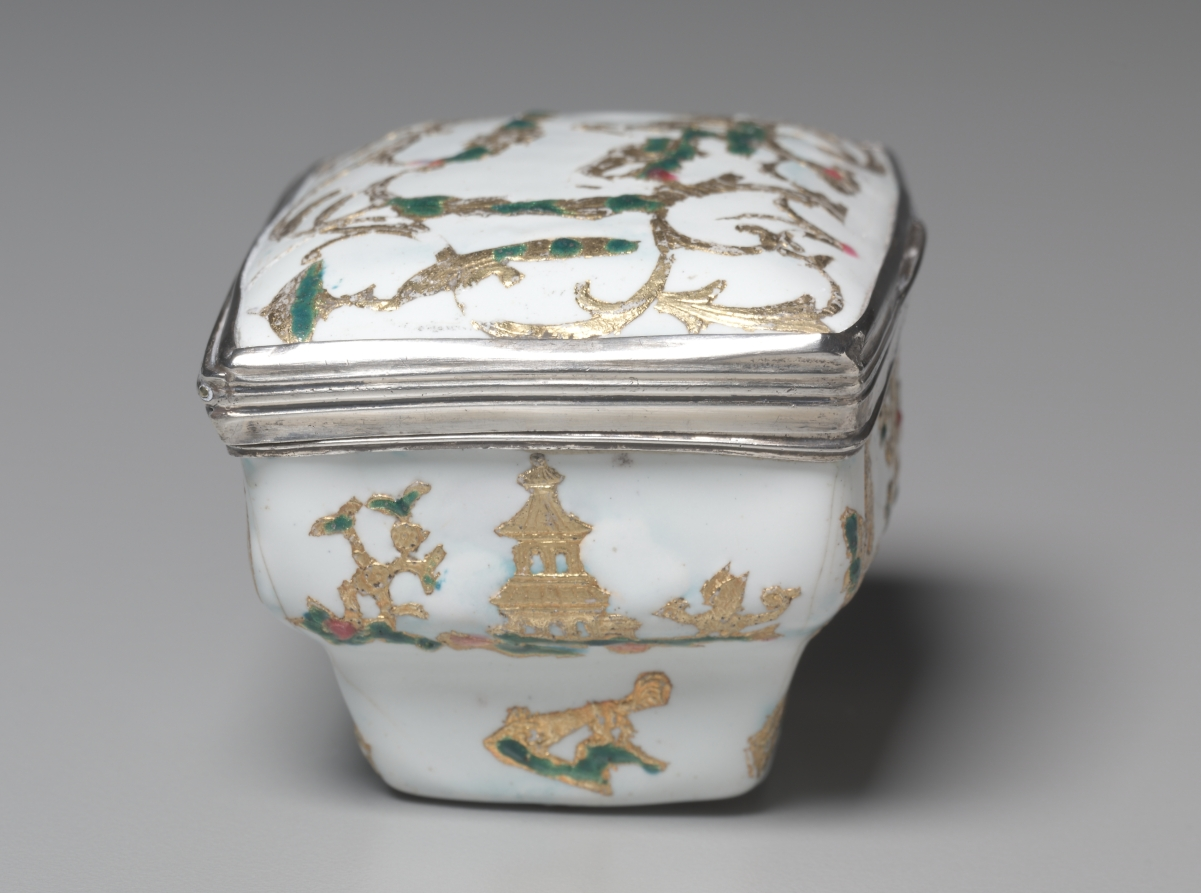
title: Box (Boîte)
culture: possibly France, mid-18th century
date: 1730–40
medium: enamel and gold leaf on copper mounted in silver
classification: Miscellaneous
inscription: [Traces of marks on mounts, too rubbed to be legible. One has previously been identified as possibly a French discharge mark of middle-18th century (Beuque 669 or 687). Maybe the discharge mark for small work of Hubert Louvet, Paris, 1732-38, left side of rim.]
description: Chinoiserie in 18th-century France incorporated imitations of East Asian motifs, designs, and ornaments into European art. These imitations were often distorted by the European imagination and were not accurate representations of the cultures from which they drew inspiration. Motifs typical of chinoiserie can be seen in this box’s floral patterns and repeated representations of pagodas, dragons, and peacocks.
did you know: The depictions of various animals and plants on this box have been covered in a very thin layer of gold called gold leaf.